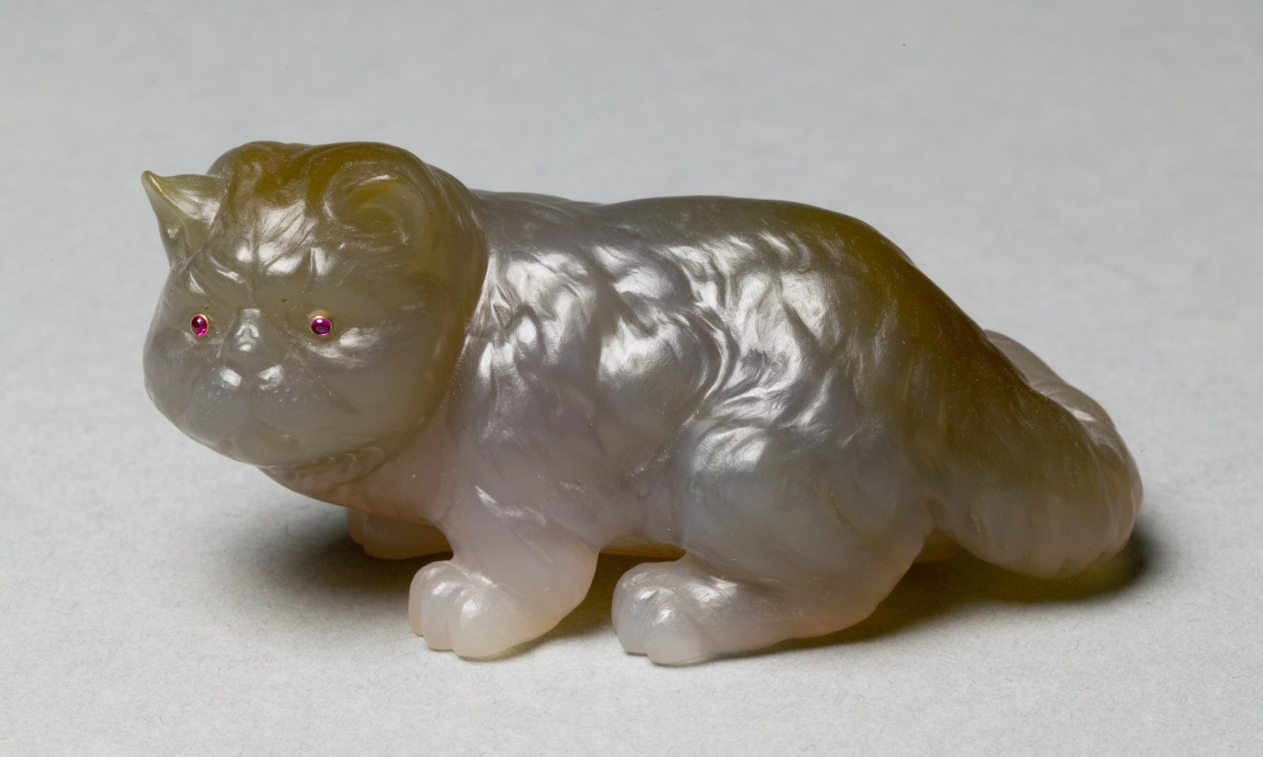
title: Seated Cat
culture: 19th century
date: c 1890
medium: agate, gem stones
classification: Miscellaneous